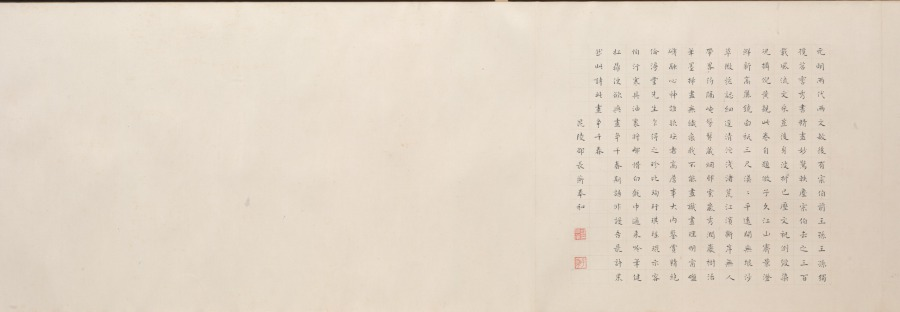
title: River and Mountains on a Clear Autumn Day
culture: China, Ming dynasty (1368–1644)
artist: Dong Qichang (Chinese, 1555–1636)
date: c. 1624–27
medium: Handscroll; ink on Korean paper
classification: Painting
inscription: 黃子久江山秋霽似此，當恨古人不見我也。思翁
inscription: 董文敏每遇高麗鏡面箋，書畫尤為入神。此卷改表紙用之，字跡隱然，兼有朝鮮之印。至於筆法圓秀，真接倪黃。豈文沈所可同日而語也。 康熙庚午中秋後一日，天氣澄爽，重裝初畢，跋於瓶廬。抱瓮翁高士奇。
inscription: Second inscription by Gao Shiqi 高士奇 (1645–1704): On the twenty-third day of the ninth month, the jiaxu year of the Kangxi era [1694], I packed my bags to head north. When my boat passed Wuchang [Suzhou], Mr. Mantang [Song Luo] brought wine to bid me farewell so that we could share our thoughts on our separation in the last few years. I showed him the paintings and calligraphy which I collected and asked his opinions. Since Mr. Mantang does not own any handscrolls by Wenmin [Dong Qichang], I leave this one for him in commemoration of our parting; thus the painting will have a worthy owner and our meeting will become a beautiful story in the future. It is the fourth day after the beginning of winter, with the sky clear and sober. Trees under frost have turned red and yellow, seemingly echoing the brush and ink in the painting. I also ask Mr. Mantang to inscribe a poem to commemorate our meeting so that it will survive forever.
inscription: 1 colophon and 4 seals of Song Luo 宋犖 (1634–1713): Who is the foremost art connoisseur of our dynasty?/ Tangcun [Liang Qingbiao, 1620–1691] is dead, so the title passes to Jiangcun [Gao Shiqi]./ Leaving office, you retired for five years in the Lake region./ Fondling handscrolls and hanging scrolls from morning to evening./ You sent me your collection catalogue Xiao Xia Lu last year;/ It is indeed the true equal of [Zhou Mi's] Yun Yan Guo Yan./ This year you returned to the capital by imperial order;/ Your boat with calligraphy and paintings anchored at the river bank in Suzhou./ When we met each other you did not waste any time for conversation by poured out immediately/ From your "coral net" extraordinary treasures./ You produced incomparable scrolls, with gold-inscribed labels and jade rollers,/ Pouring out from bags and trunks, they were spread in disarray./ Without a word, I rolled and unrolled until my fingers were numbed,/ We sat straight, facing each other quietly, and never felt tired./ For three days we forgot about sleeping and food./ And at times we shouted our joy out loud, forgetting who is host or guest./ Your Dwelling in the Fuchun Mountains and the Yuansheng manuscript/ These peerless works I myself examined with delight./ As an added pleasure to the farewell dinner under the Maple Bridge,/ You allowed me to hold again this handscroll by Dong Qichang--/ The Misty River and Piled Peaks [by Zhao Mengfu] and this Clear Autumn Day are two extraordinary masterpieces./ In showing such life and spirit with "qi yun." the artists were truly "men of heaven."/ The Clear Autumn Day is not even three feet long,/ Painted on tributary Korean paper, it shines like silver./ Every building up and every turn of the mountains imitates nature,/ Every tree and every rock is removed from the commonplace./ From the beginning, the theory of poetry is the theory of painting,/ Like the lotus and the morning sunshine, they complement and refresh each other./ The artist's inscription regrets that "the Old Masters cannot see my scroll."/ Huang Gongwang would have agreed in his grave./ The vermilion of the seals glitter and dazzles the eyes,/ These added accessories are as valuable as jade./ You are very kind to give it to me,/ The feelings expressed in your inscription are so sincere./ Wanting to refuse, but unable, I accept it to respect your wish,/ And taking off my gown and cap I wrapped it with care./ You asked me to write a long poem in commemoration of this beautiful occasion,/ I am too ashamed that my effort in response is so poor and inadequate./ Returning home, I unrolled it under candlelight, trying to write the colophon,/ The light of the waning moon shines at the foot of the mossy wall./ Earnestly humming and brows knit in deep thought, I try to compose;/ The verses are not outstanding, but the facts are real./ With this poem recorded at the end of the scroll, I mail it to you for approval,/ This poem and this painting shall outlast a thousand springs. (Translation by LYSL/HK/WKH)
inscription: 1 colophon and 2 seals of Shao Changheng 邵長蘅 (1637–1704); 2 inscriptions and 14 seals of the Qianlong 乾隆 emperor (r. 1736–95); 1 seal of the Jiaqing 嘉慶 emperor (r. 1796–1820); 3 seals of the Xuantong 宣統 emperor (r. 1908–11); 1 seal unidentified.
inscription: [印] 朝鮮國王之印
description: Dong Qichang had a tremendous impact on the artistic practices and historiography of later generations; his works and writings shaped literati aesthetics. Here, Dong places an abstract landscape composition diagonally across the picture plane, configured to recall earlier masters and simultaneously express his own personal style. Dong’s inscription claims, Huang Gongwang’s Autumn Day, looks like this. I truly regret the master has not seen my work. In fact, Dong Qichang may have had Dong Yuan’s Xiao and Xiang Rivers in mind, a work he owned and considered a key work in Chinese art history.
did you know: The painting has an imprint of a Korean seal that reads "Seal of the king of Joseon."